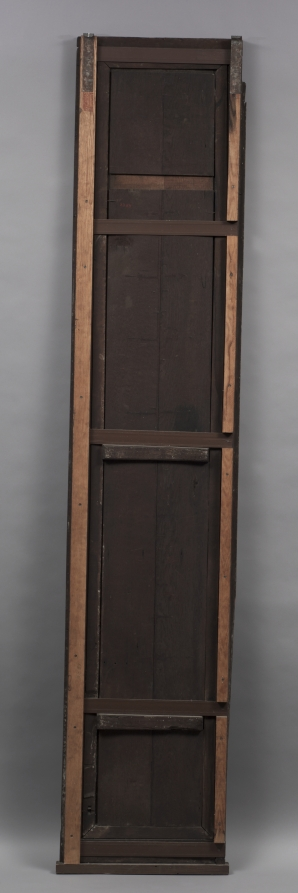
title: Panel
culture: France, Regency Period, 18th Century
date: 1715–1723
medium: wood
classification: Furniture and woodwork